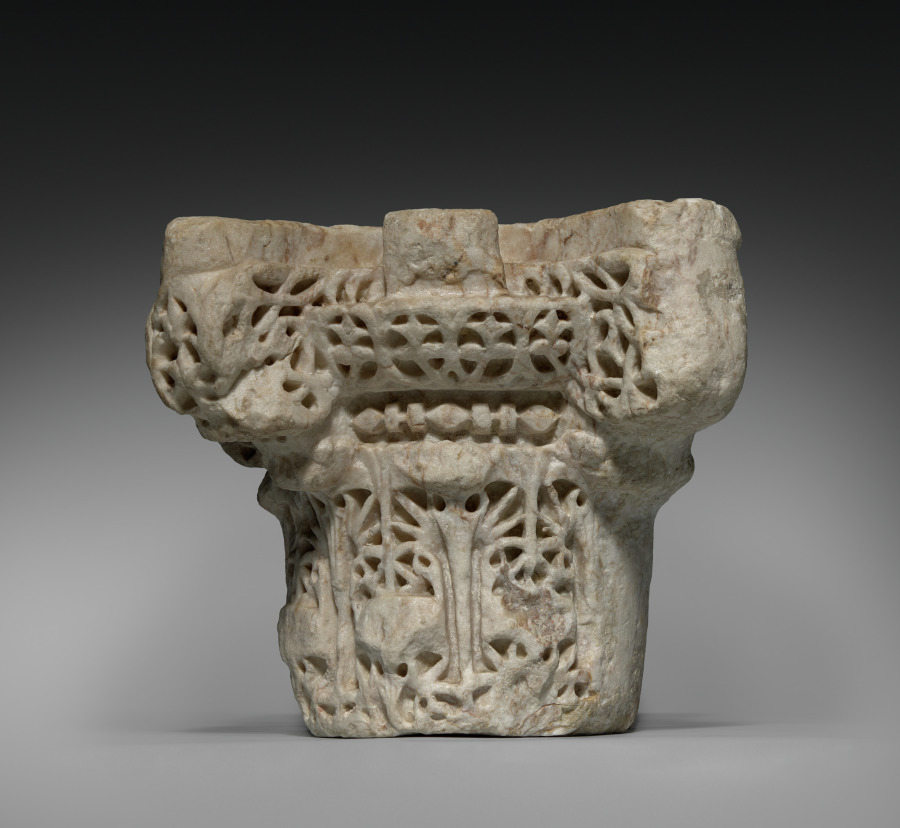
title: Column Capital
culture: Spain, Cordoba, Madinat al-Zahra, Spanish Umayyad period (756–1031)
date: c. 960–76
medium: Marble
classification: Sculpture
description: This capital comes from the palatial city of Madinat al-Zahra near Cordoba (Spain) which was begun by caliph Abd al-Rahman III (r. 912–61) around 936. Large parts of the Iberian Peninsula were then under Islamic rule and experienced a cultural flowering. The city, destroyed already in 1010, was the most magnificent palace complex in Europe at the time.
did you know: In the mid-1800s the ruins of Madinat al-Zahra were rediscovered and became the source of great fascination as people imagined a palace like that in the stories of One Thousand and One Nights.